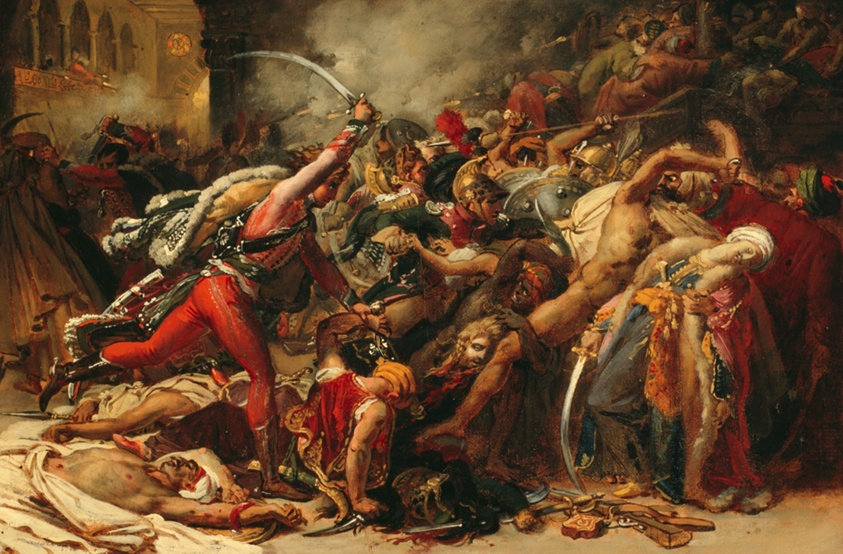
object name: Painting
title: Sketch for The Revolt of Cairo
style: nineteenth century, 19th century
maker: Anne-Louis Girodet de Roussy-Trioson (French, 1767-1824)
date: c. 1810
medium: Oil and ink on paper, laid down on canvas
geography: France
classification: oil on paper; french; france; sketch; drawing; paint; ink on paper; painting; european painting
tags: battles, blood, colonialism, death, Egypt, fabric, France, guns, luxury, sketch, smoke, soldiers, swords, textile, violence